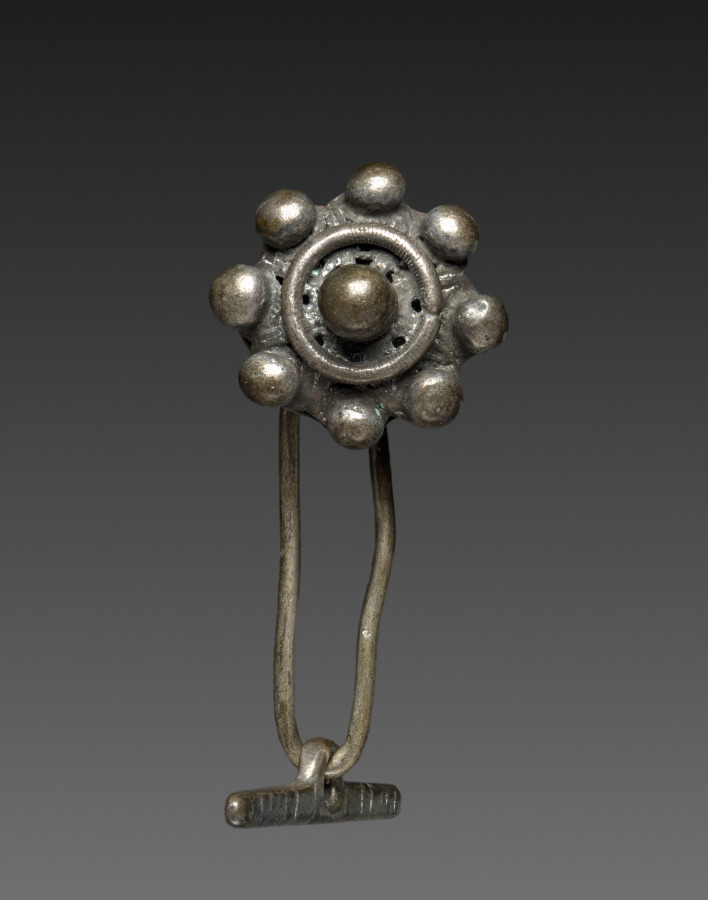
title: Button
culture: Italy, Sardinia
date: 1800s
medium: silver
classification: Jewelry